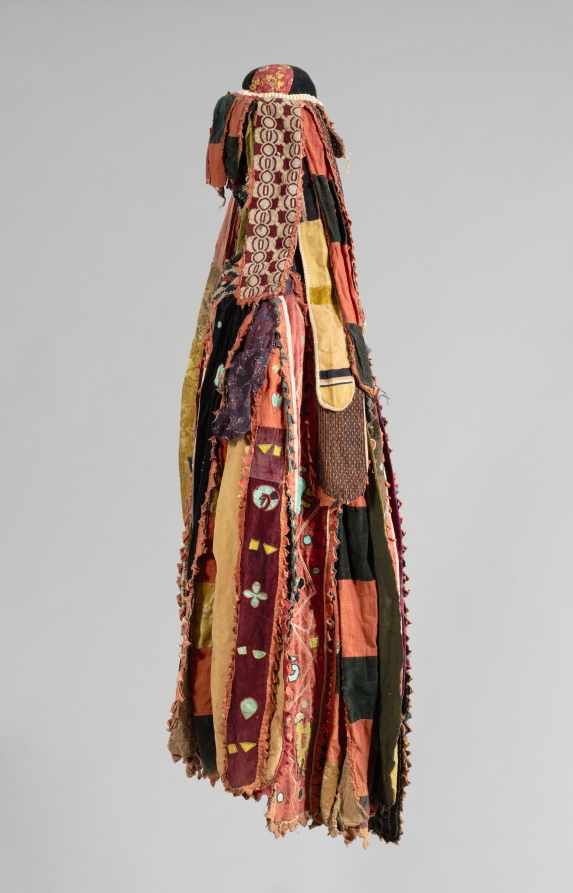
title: Egúngún Masquerade Dance Costume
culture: Africa, West Africa, Nigeria, Yorùbá-style maker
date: 1900s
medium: cotton, velvet, flannel, leather, dye, probably wood, cowrie shells, metal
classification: Mask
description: Swirling into motion, egúngún masquerade costumes appear during annual festivities to bless the community. Manifesting ancestral spirits, they serve as a bridge between the living and the otherworld. The fabric panels create a dwelling place for ancestral spirits. Arranged and selected according to Yorùbá design sense (ojú-ọnà), this mask incorporates hundreds of African, Asian, and European fabrics. These include imported damasks, velvets, faux furs, and embroideries, as well as local indigo-dyed cottons.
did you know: This masquerade costume is made from both imported and locally made fabrics.